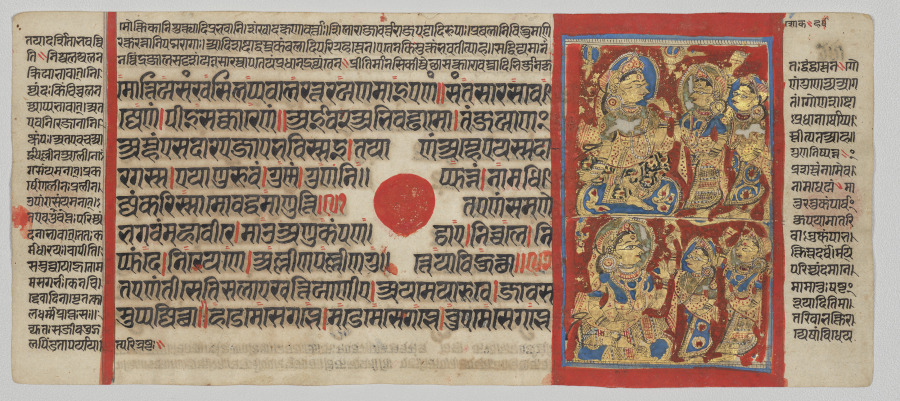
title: Queen Trishala's Grief and Happiness, Folio 29 (recto), from a Kalpa-sutra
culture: Western India, Gujarat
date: c. 1475–1500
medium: Gum tempera, ink, and gold on paper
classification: Painting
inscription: [[upper right]] śoka/harśa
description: This page discusses the pregnancy of Queen Trishala when she was anxious about why she could not feel the baby move. In the painting she addresses her handmaids: “Has the child in my womb been destroyed? Has he been killed? Have I suffered a miscarriage? The child used to move, but now he does not move.” The baby is Mahavira, who will grow to be the historical founder of the Jain religion. According to the text, he remained motionless out of compassion for his mother, not wishing to disturb her. Once he realized how worried she was, he made a little movement, and this filled her with joy.